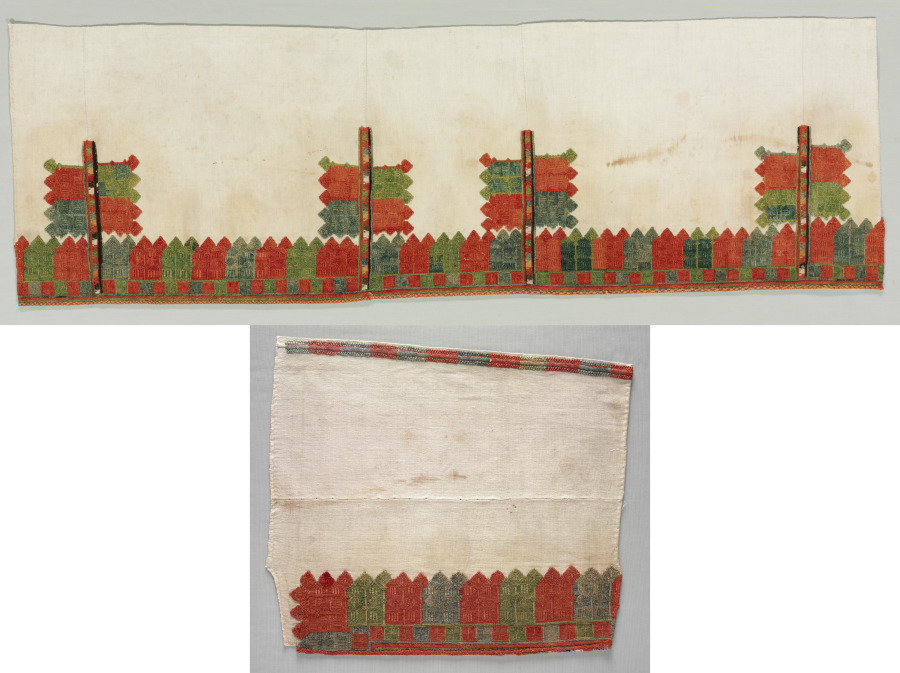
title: Skirt Border and Sleeve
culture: Greece, Dodecanese Islands, 18th century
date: 1700s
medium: embroidery: silk on cotton tabby ground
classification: Embroidery